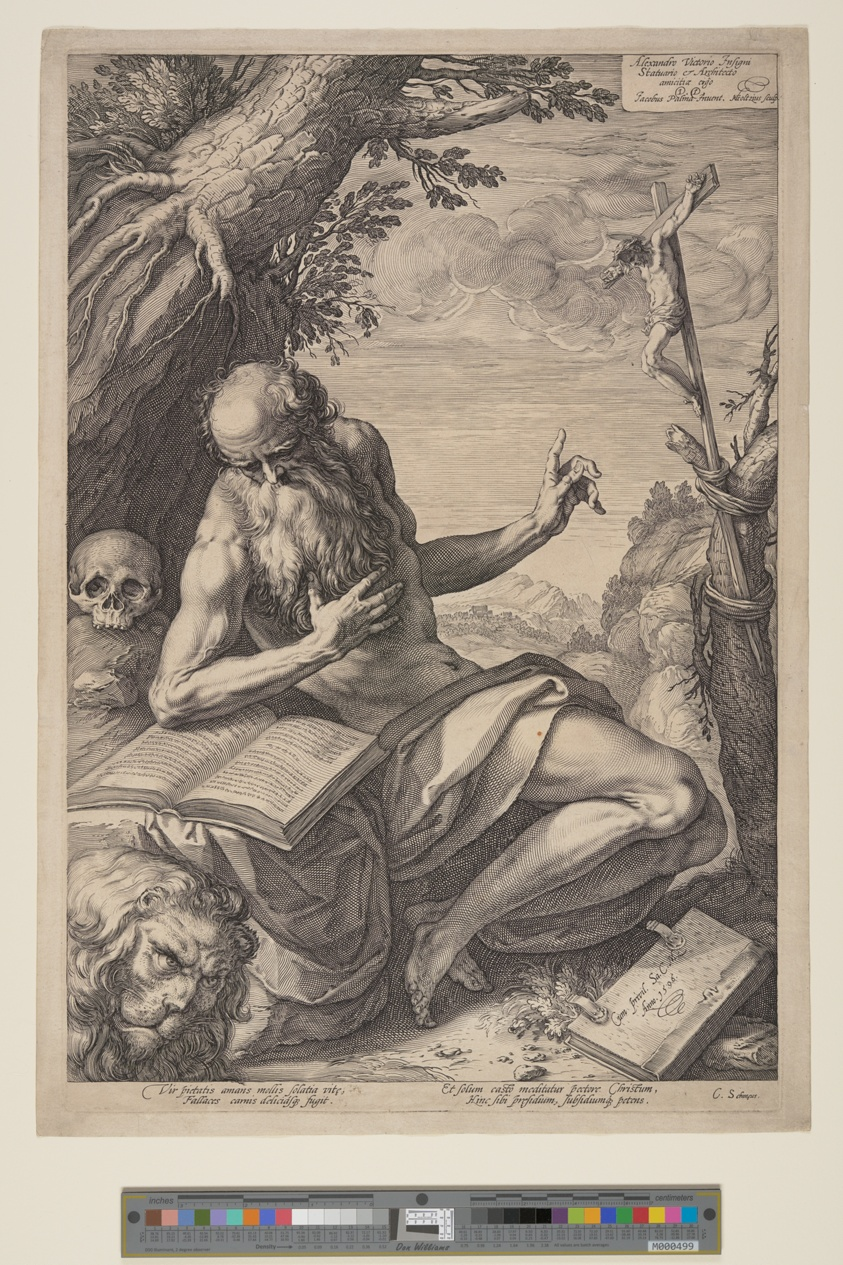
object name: Print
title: St Jerome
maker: Hendrick Goltzius (Dutch, 1558–1617); after Jacopo Palma il Giovane (Italian, 1544–1628)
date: 1596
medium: Engraving on ivory laid paper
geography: Netherlands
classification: engraving; paper; print; prints and drawing